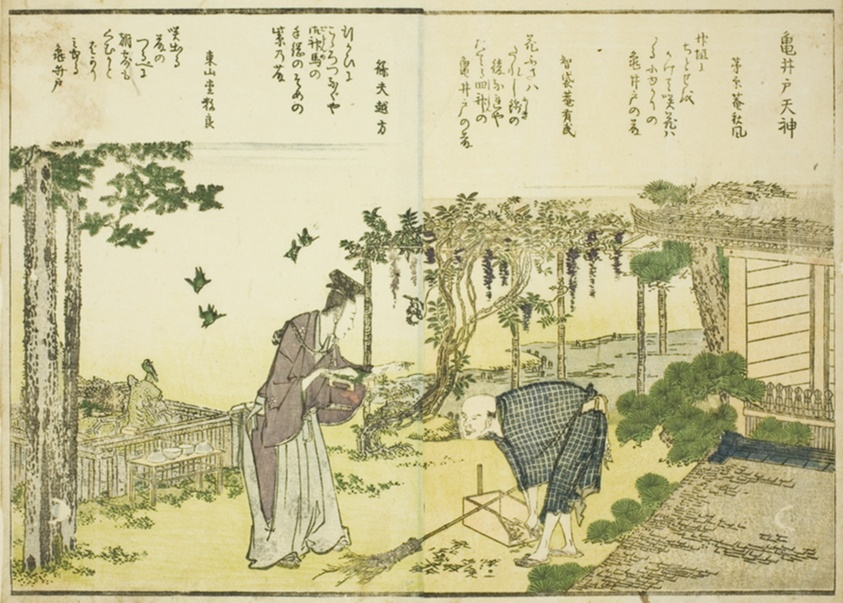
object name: Print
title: Kameido Tenjin Shrine, from vol. 1 of the illustrated book "Fine Views of the Eastern Capital at a Glance (Toto shokei ichiran)"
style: Japanese (culture or style)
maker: Katsushika Hokusai 葛飾 北斎; Japanese, 1760-1849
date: 1800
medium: Color woodblock print; double-page illustration from book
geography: Japan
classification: woodblock print; print; asian art